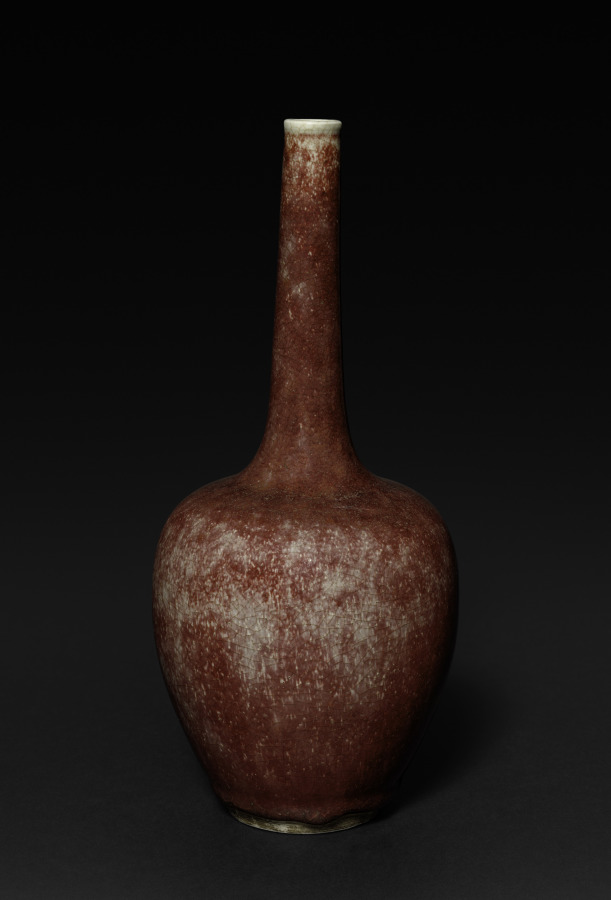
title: Bottle Vase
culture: China, Jingdezhen, Jiangxi province, Qing dynasty (1644–1911), Kangxi reign (1662–1722)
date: 1662–1722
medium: porcelain, Lang ware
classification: Ceramic